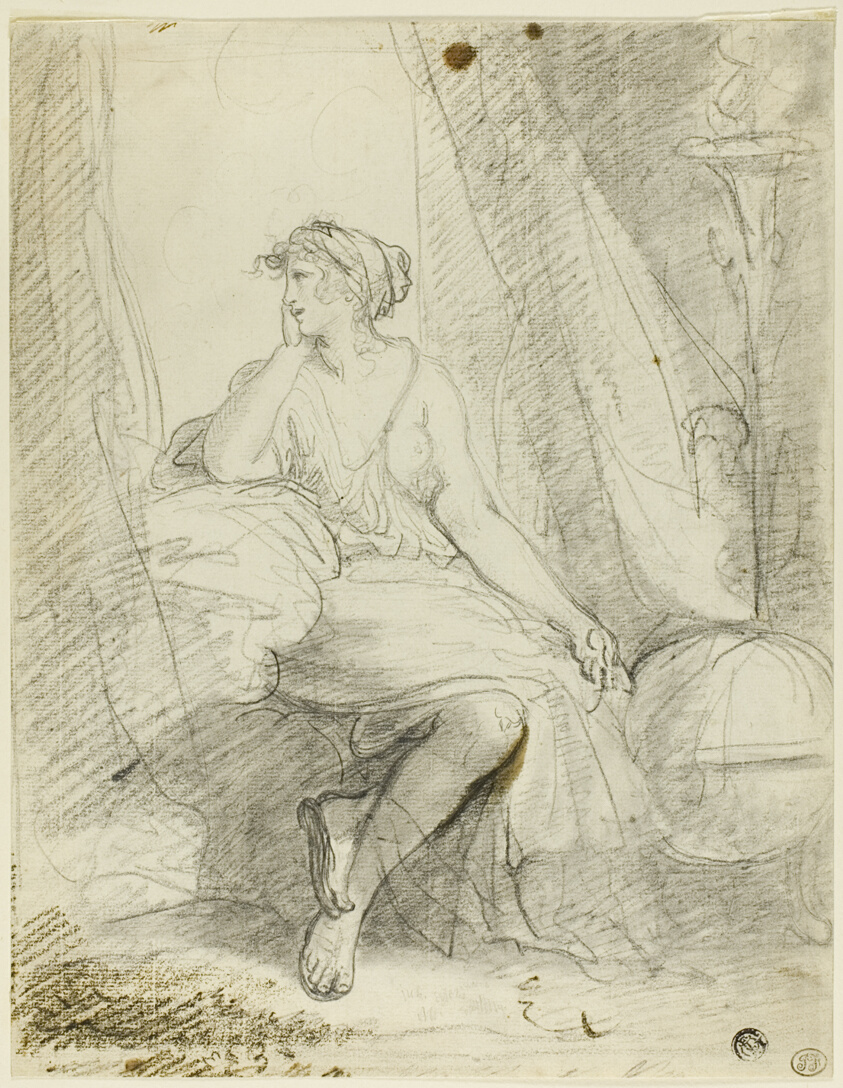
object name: Drawing and Watercolor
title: Seated Woman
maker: John Hoppner (English, 1758-1810)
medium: Black chalk and black crayon, on ivory laid paper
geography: England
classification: chalk; drawings (visual works); prints and drawing